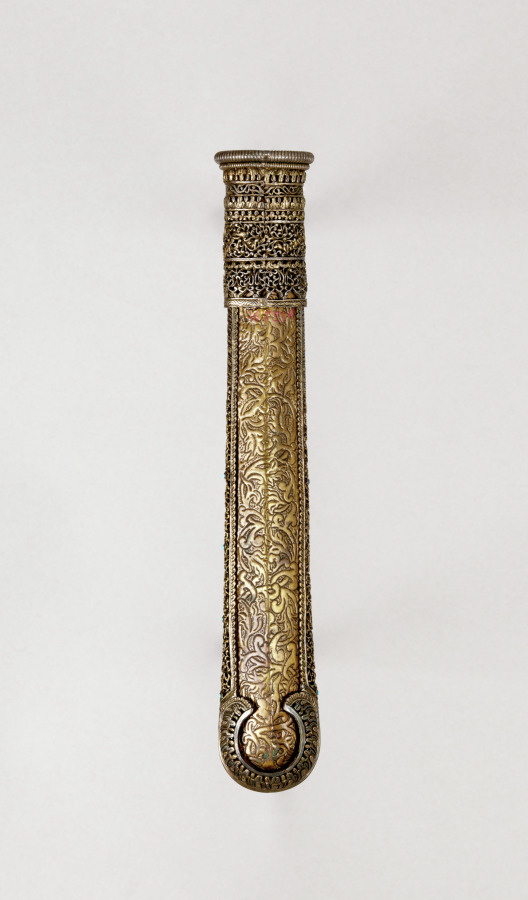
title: Scabbard for Dagger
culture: Northeast India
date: c. 1750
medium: brass with gilt grip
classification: Arms and Armor